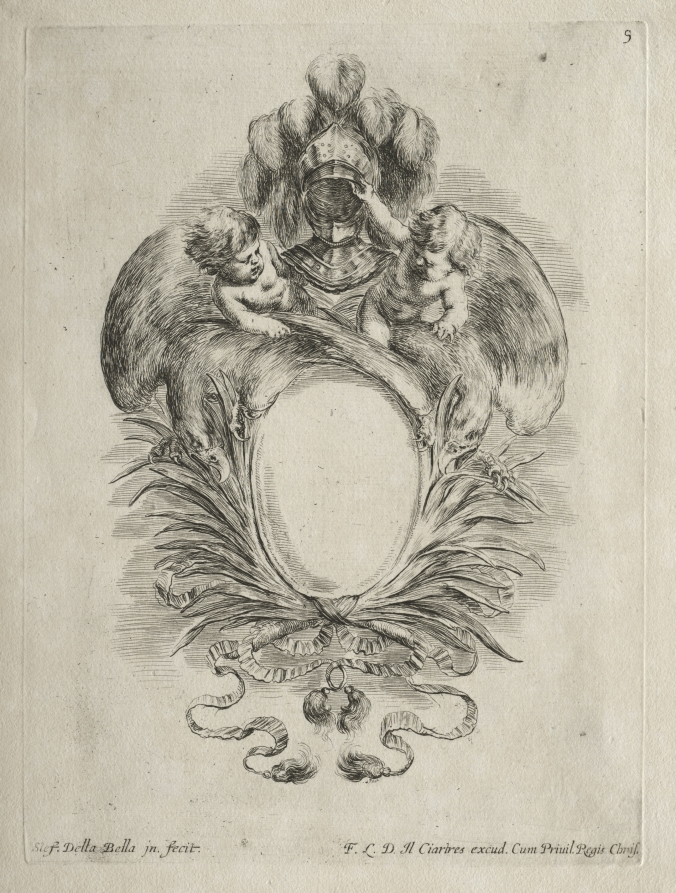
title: Collection of Various Caprices and New Designs of Cartouches and Ornaments: No. 5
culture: Italy, 17th century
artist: Stefano Della Bella (Italian, 1610–1664)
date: 1646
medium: etching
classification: Print